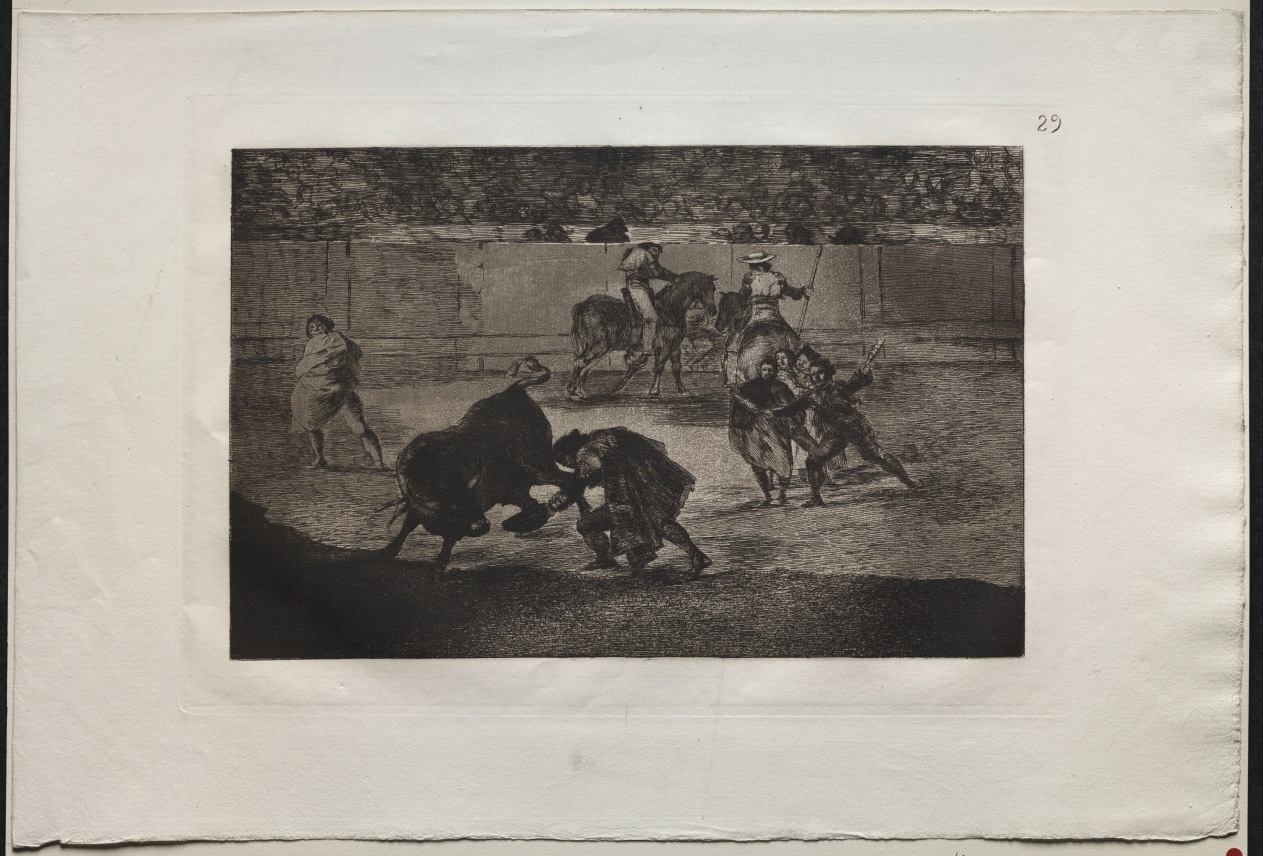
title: Bullfights: Pepe Illo Making the Pass of the "Recorte"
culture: Spain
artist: Francisco de Goya (Spanish, 1746–1828)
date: 1816, printed 1876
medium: engraving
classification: Print